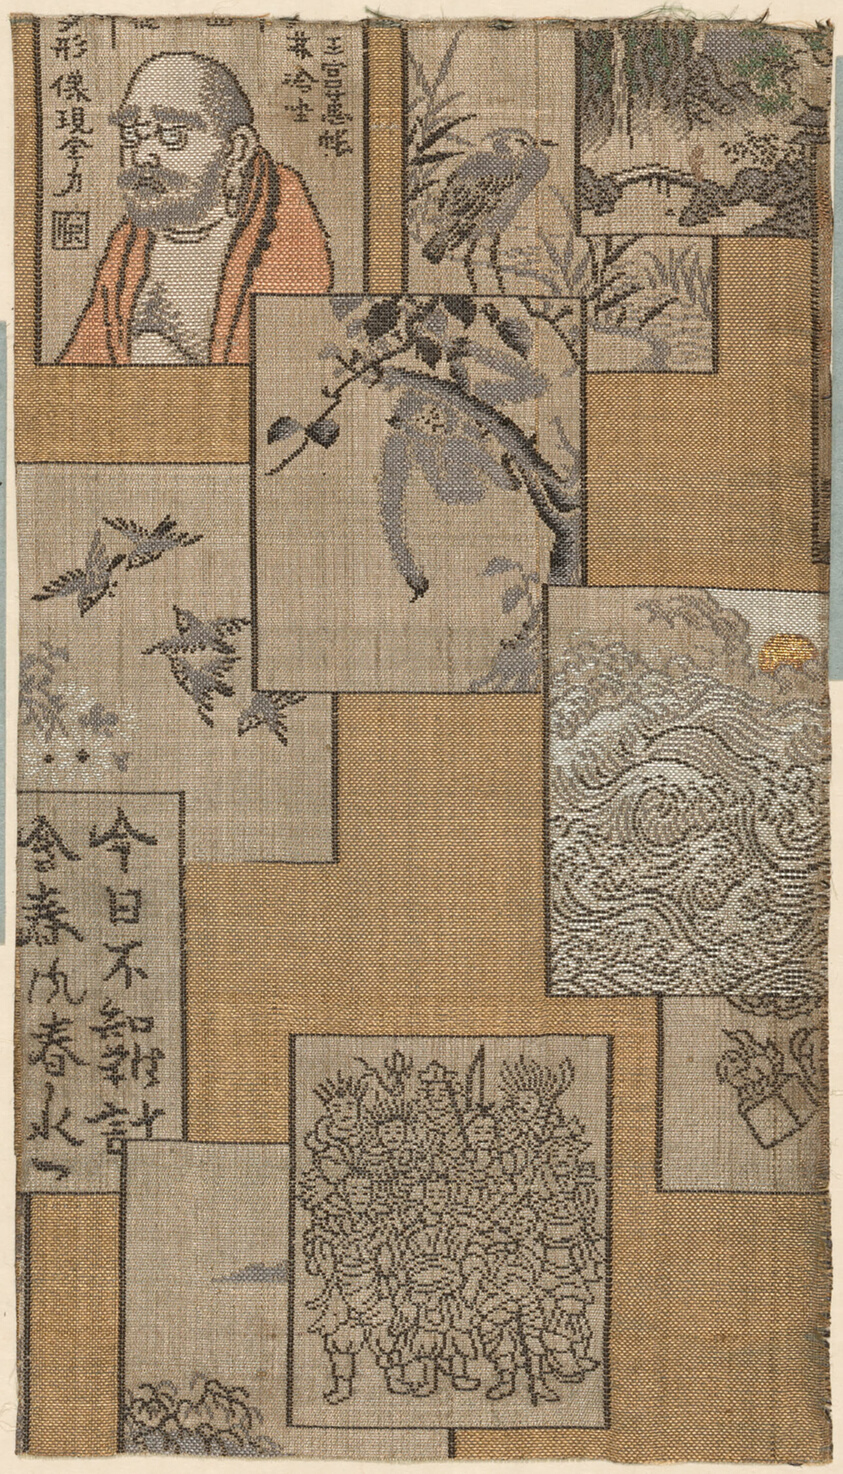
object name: Textile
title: Fragment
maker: Japan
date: 18th/19th century, Edo period (1615–1868)/ Meiji period (1868–1912)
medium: Brocaded single plain compound cloth, silk & gilt paper wound on pink silk (?) core.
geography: Japan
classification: textile; weaving